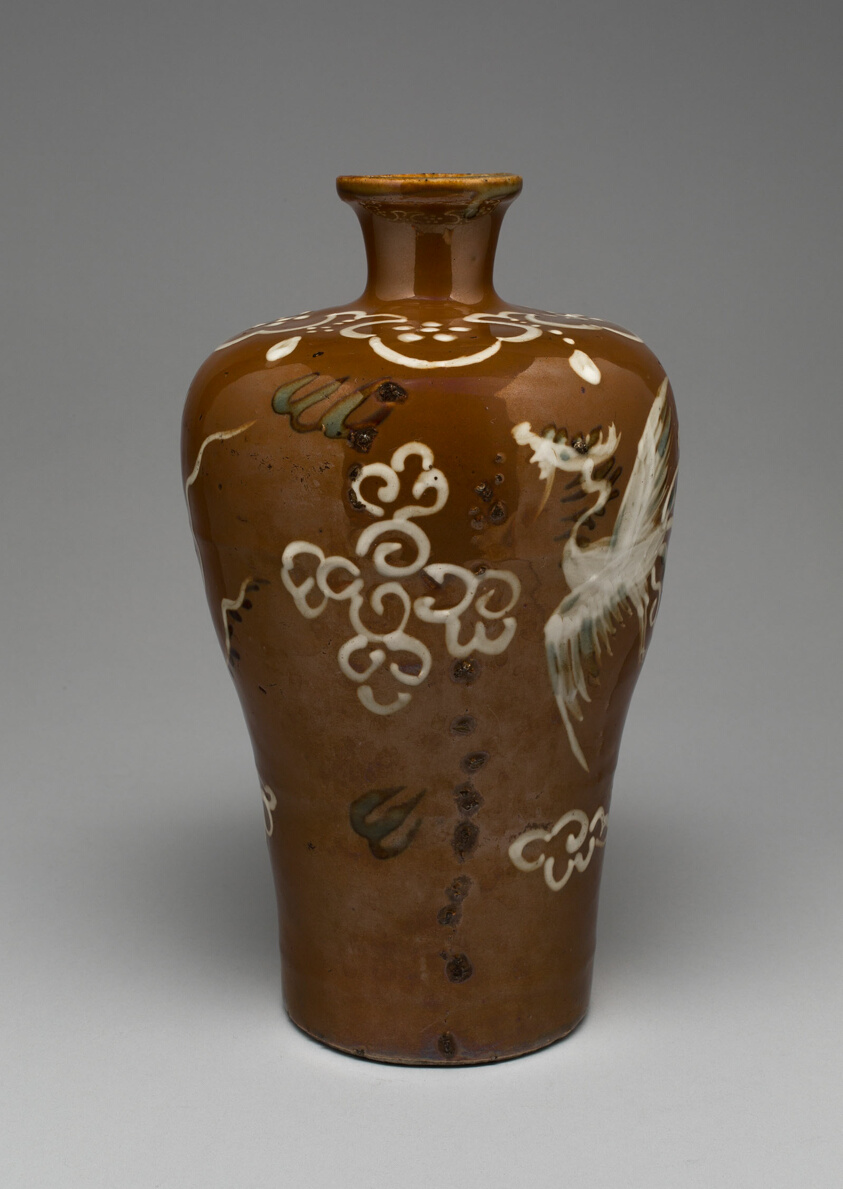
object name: Vessel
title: Bottle-Shaped Vase (Meiping) with Phoenixes amid Clouds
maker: China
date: Ming dynasty (1368–1644)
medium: Porcelain painted in overglaze enamels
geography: China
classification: porcelain; asian art; ceramics; vessel